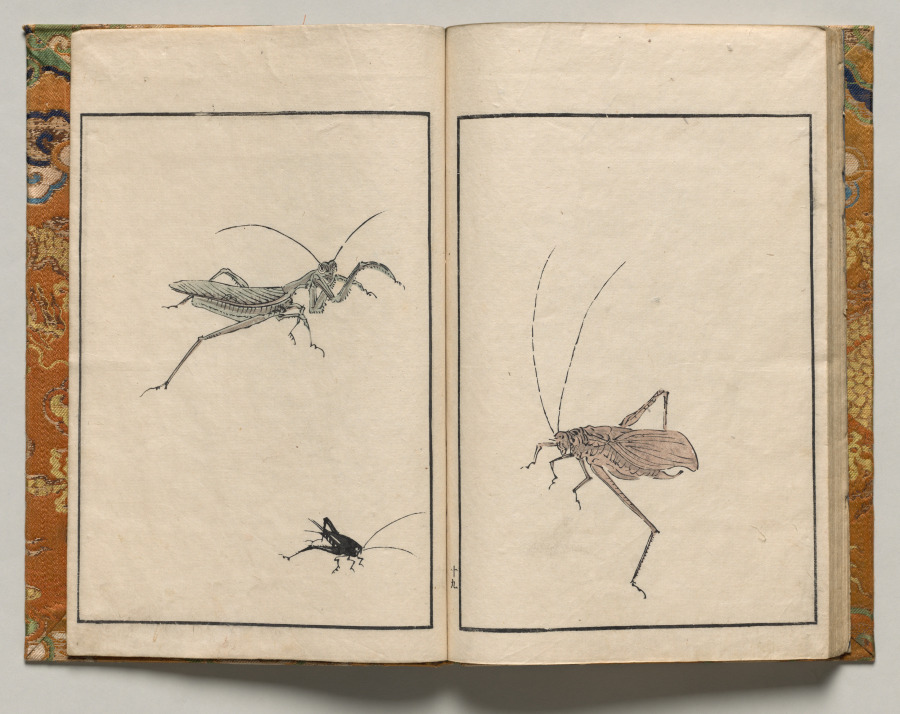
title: Crickets, Design Nineteen from Shazanrō Picture Book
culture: Japan, Edo period (1615–1868)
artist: Tani Bunchō (Japanese, 1763–1841)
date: 1816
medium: Woodblock-printed book; ink and color on paper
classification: Bound Volume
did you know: Shazanrō was one of Tani Bunchō's style names.